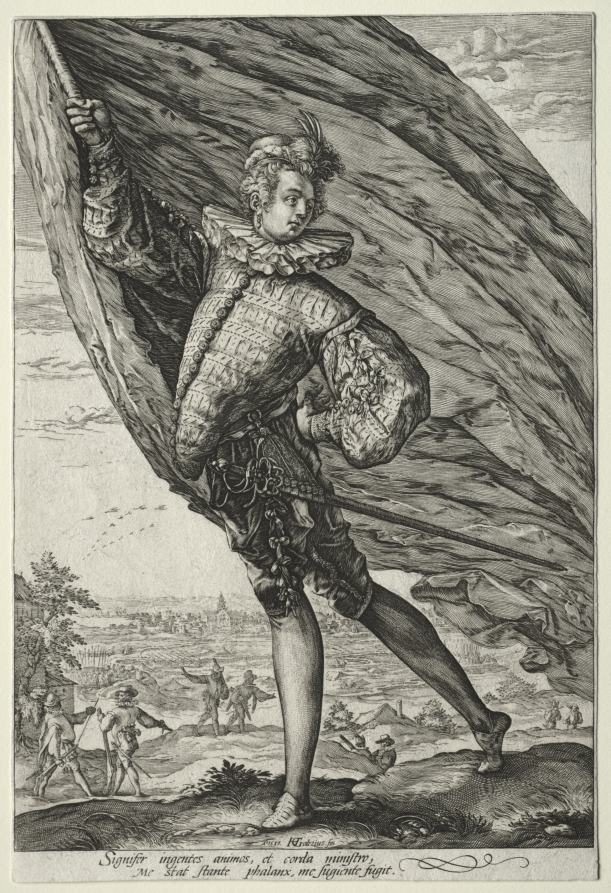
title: The Standard Bearer, Turned to Left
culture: Netherlands, 16th century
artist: Hendrick Goltzius (Dutch, 1558–1617)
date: 1587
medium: engraving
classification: Print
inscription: lower center, in plate: A°1587. HG[in monogram]oltzius.fe. ; across bottom, in plate: Signifer ingentes animos, et corda ministro, / Me stat stante phalanx, me [f?]ugiente fugit. ; VERSO, by Lisa or Leonard Baskin, lower center, in pen and black ink: Lisa & Leonard Baskin / 1967. ; lower left, in graphite: KA 524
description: Around 1587 Goltzius drew designs for 12 prints depicting officers and soldiers in landscape settings, which were engraved by his pupil Jacques de Gheyn II. Goltzius himself engraved a related pair of prints, The Captain of Infantry and The Great Standard Bearer. A central figure in the army and civic guard, the standard bearer marked the position of the captain. At this time, the Netherlands were trying to oust their Spanish rulers and these prints were conceived as flamboyant expressions of military pride.